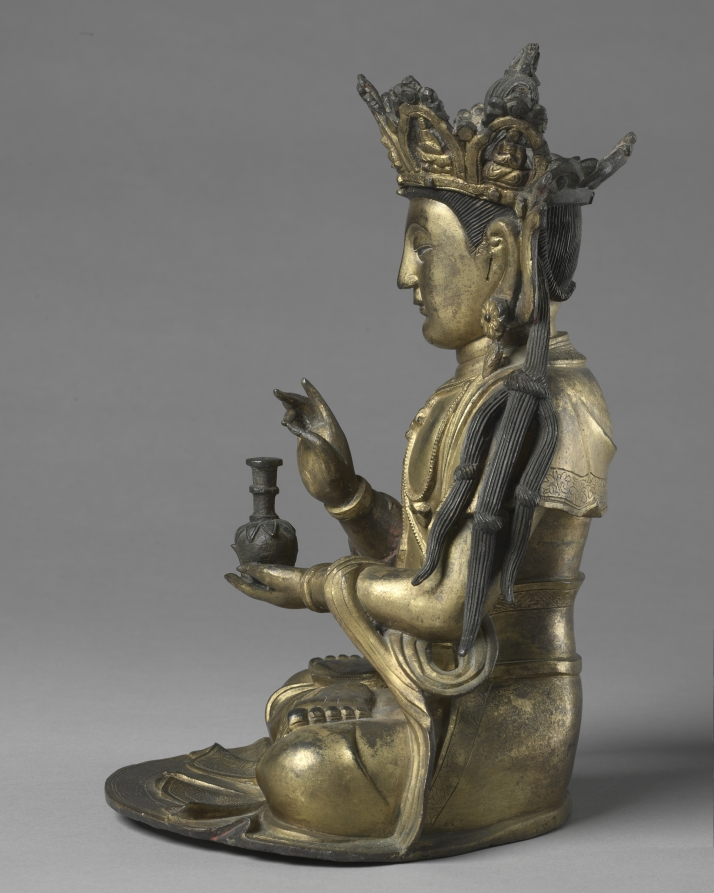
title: Seated Guanyin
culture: China, Ming dynasty (1368–1644)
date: 1368–1644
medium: gilt bronze with polychromy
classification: Sculpture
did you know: This bronze sculpture was created using the lost wax method of casting.